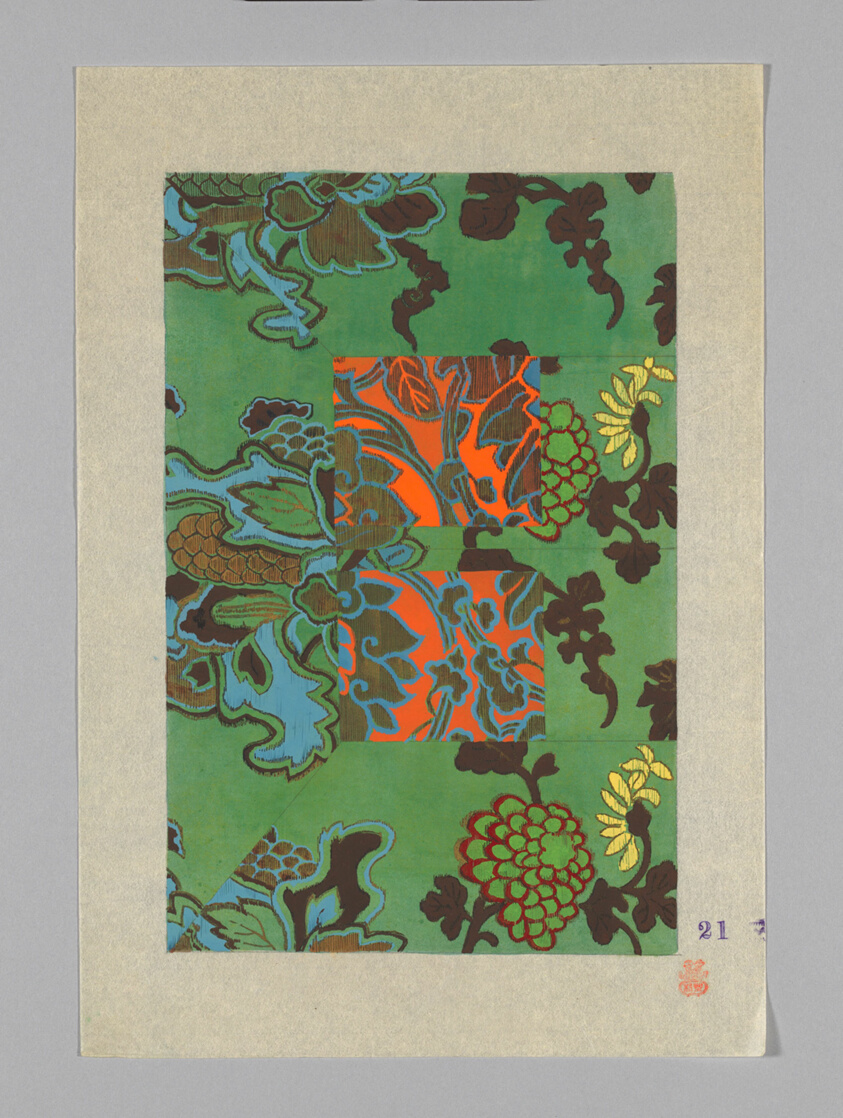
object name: Drawing and Watercolor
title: Design on Paper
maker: Japan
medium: Paper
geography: Japan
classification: textile; accessory - paper design; watercolor; paper